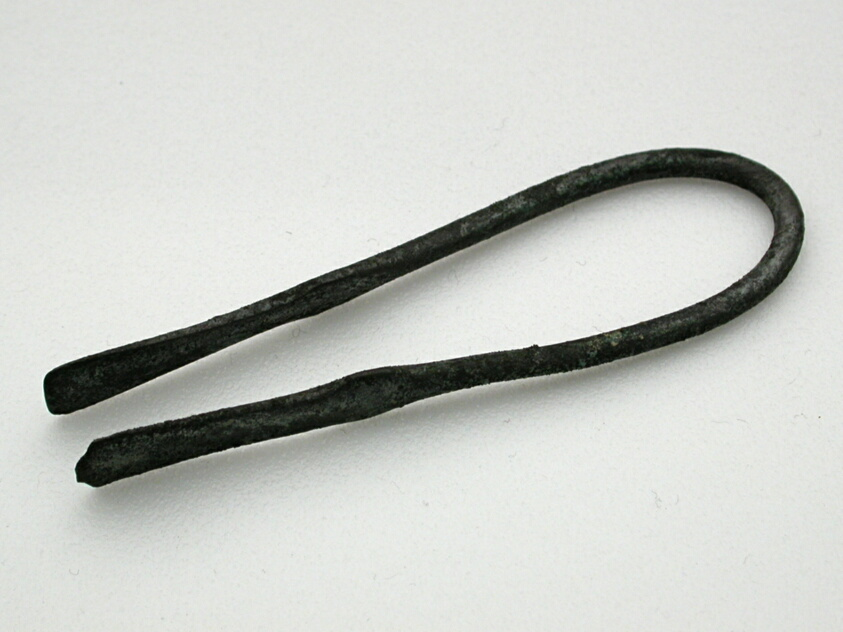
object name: Costume and Accessories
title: Tweezers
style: egyptian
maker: Egyptian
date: New Kingdom, Dynasty 18 (about 1550–1295 BCE)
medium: Bronze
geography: Egypt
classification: utensil; bronze; metal; ancient art; costume